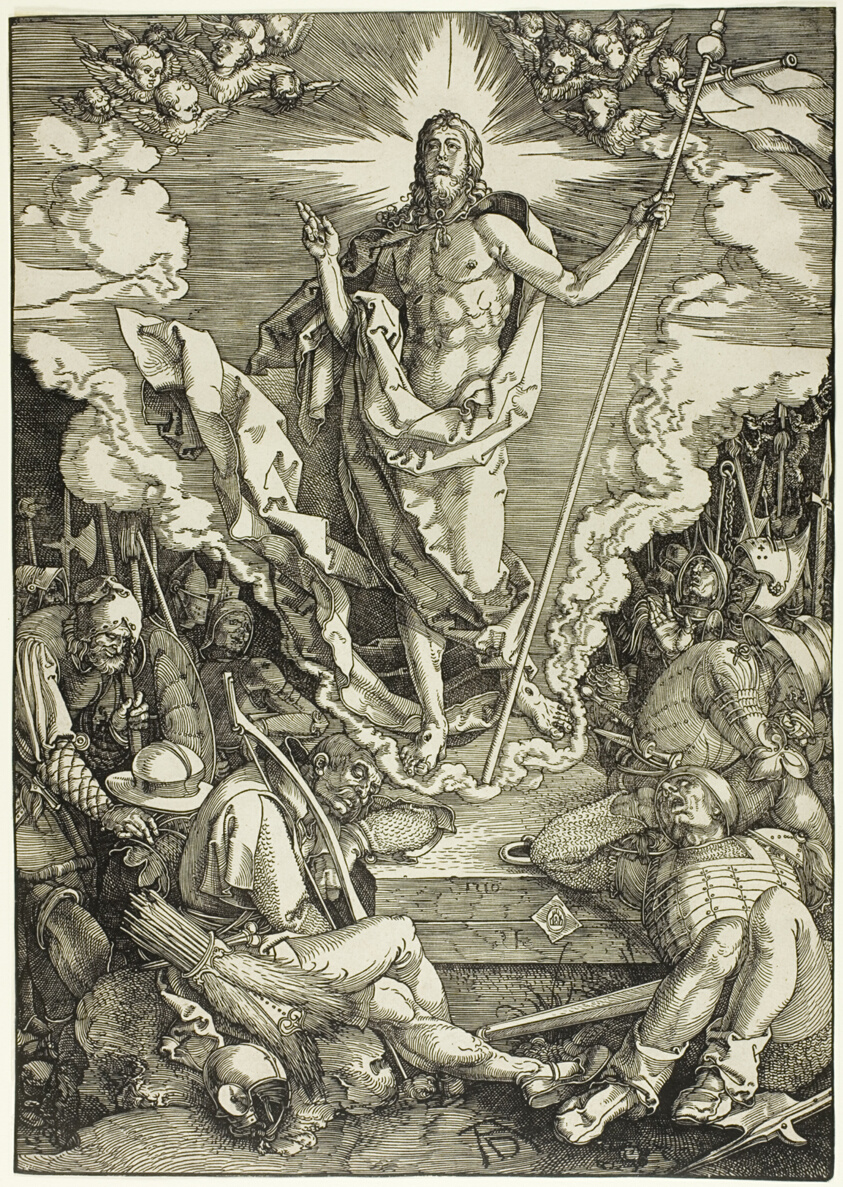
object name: Print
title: The Resurrection, from The Large Passion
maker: Albrecht Dürer (German, 1471-1528)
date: 1510, published 1511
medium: Woodcut in black on ivory laid paper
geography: Germany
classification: woodcut; print; prints and drawing; paper